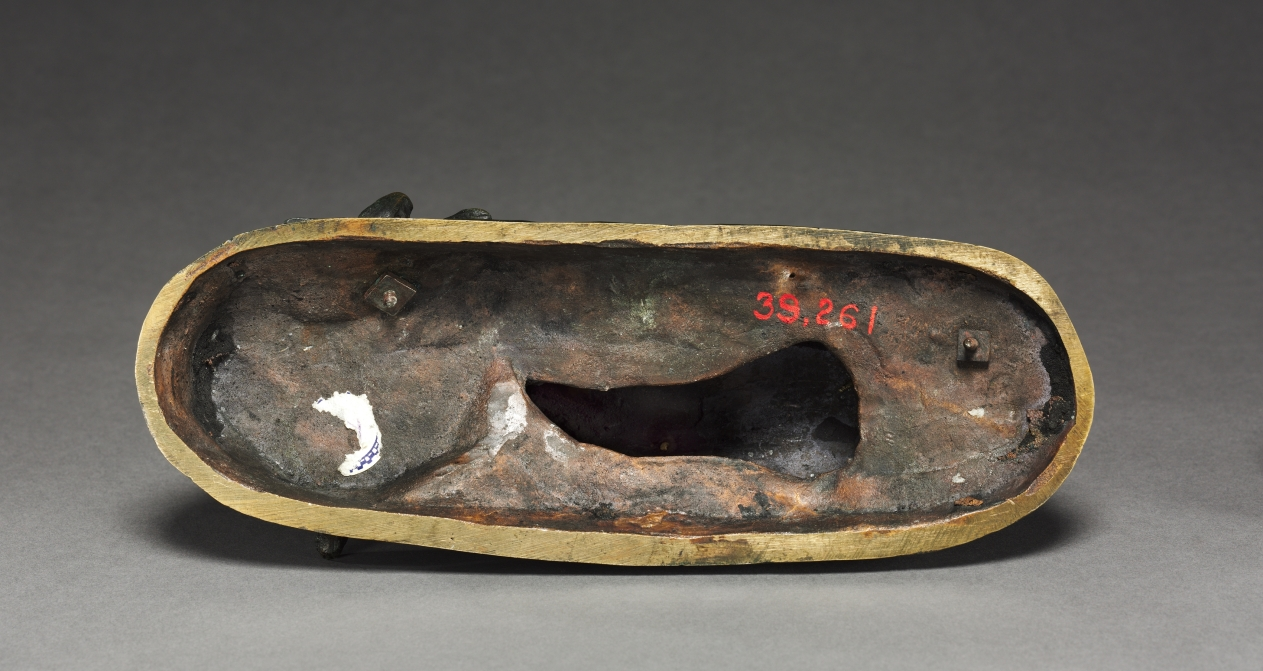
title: Jaguar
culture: France, 19th century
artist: Antoine-Louis Barye (French, 1796–1875)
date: c. 1850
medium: bronze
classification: Sculpture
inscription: On base, back of left hind leg: (L?). Barye"